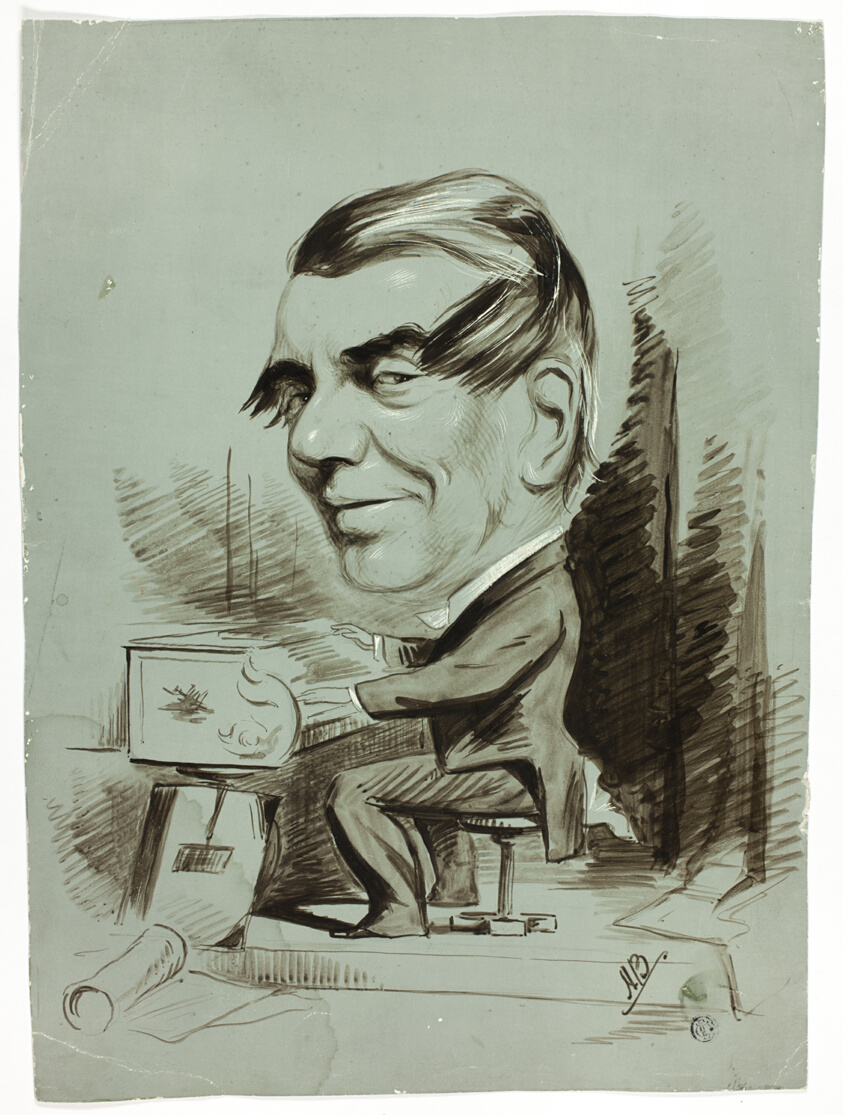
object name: Drawing and Watercolor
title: Caricature of Piano Player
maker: John Doyle (Irish, 1797-1868)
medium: Brush and brown wash, with scraping, on ivory wove paper, prepared with a blue-gray ground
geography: Ireland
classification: pen and ink drawings; drawings (visual works); prints and drawing